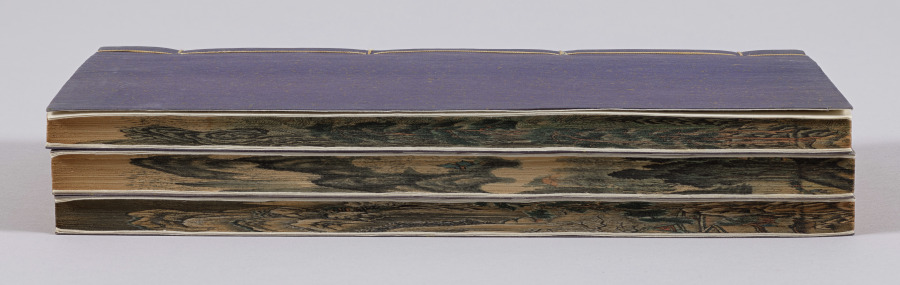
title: Yu-hai (Ocean of Jade) woodblock bound volume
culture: China, Ming dynasty (1368–1644)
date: 1368–1644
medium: woodblock-printed book with painted edges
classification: Bound Volume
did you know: When each book is rolled to form a cylinder, a landscape appears on the edges, painted in ink and washes of color.